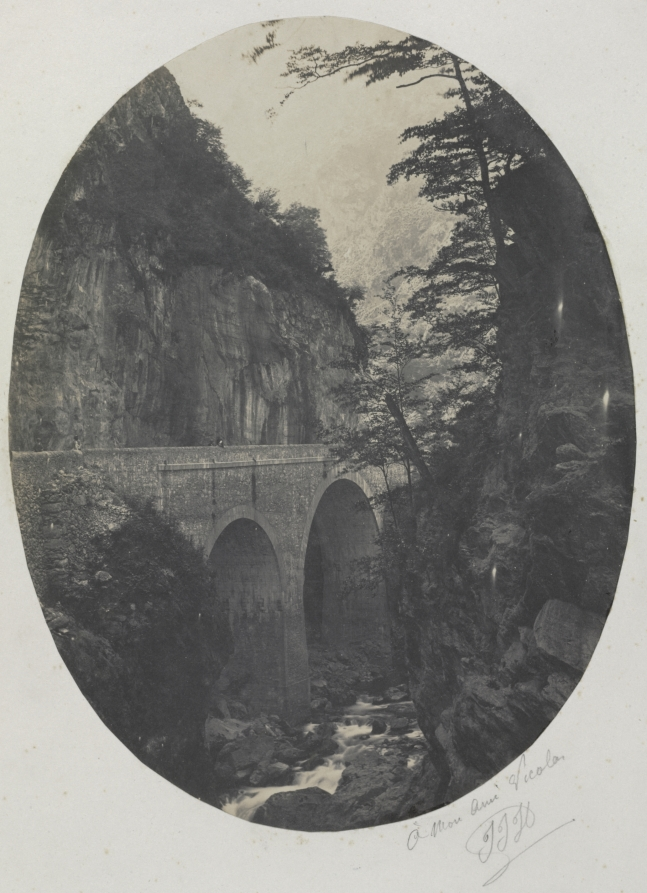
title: Gorge at Eaux Chaudes, Pyrenees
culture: France, 19th century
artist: Jean-Jacques Heilmann (French, 1822–1859)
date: c. 1855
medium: salted paper print from wet collodion negative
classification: Photograph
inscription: Written in pencil on recto of mount: "À Mon Ami Nicola / JJH"; "Nouvelle Route des Eaux Chaudes"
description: Little is known of the life and career of J. J. Heilmann. He was fascinated by the subject of civilized human life in the context of the primitive world. In this instance, the monumental stone bridge with a few tiny figures insert a human presence into what would otherwise be an overpowering natural setting. The arched structure is not only a reminder of the human ambition to compete with nature, it also blends in with the surrounding stone cliffs, suggesting a harmonious relationship.